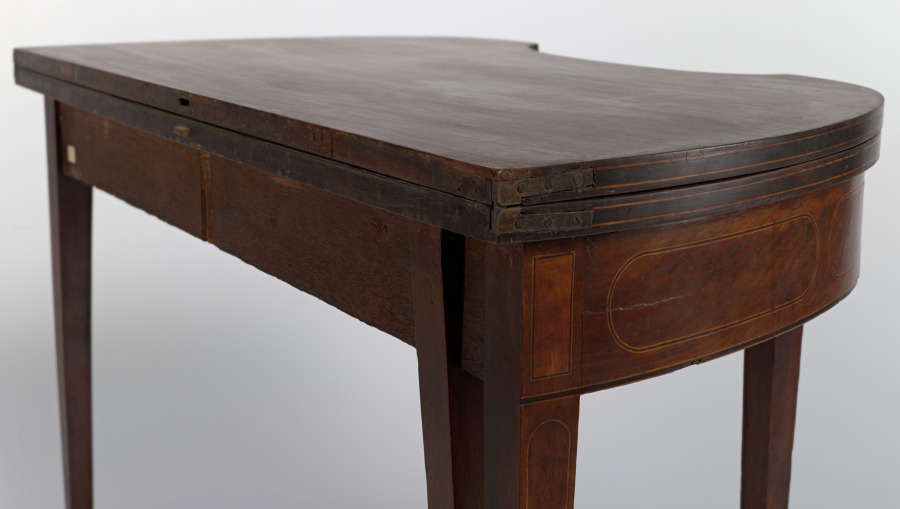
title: Game Table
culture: America, Maryland, Baltimore, early 19th Century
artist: style of George Hepplewhite (American, 1786)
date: c. 1800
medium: mahogany with inlays of various woods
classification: Furniture and woodwork